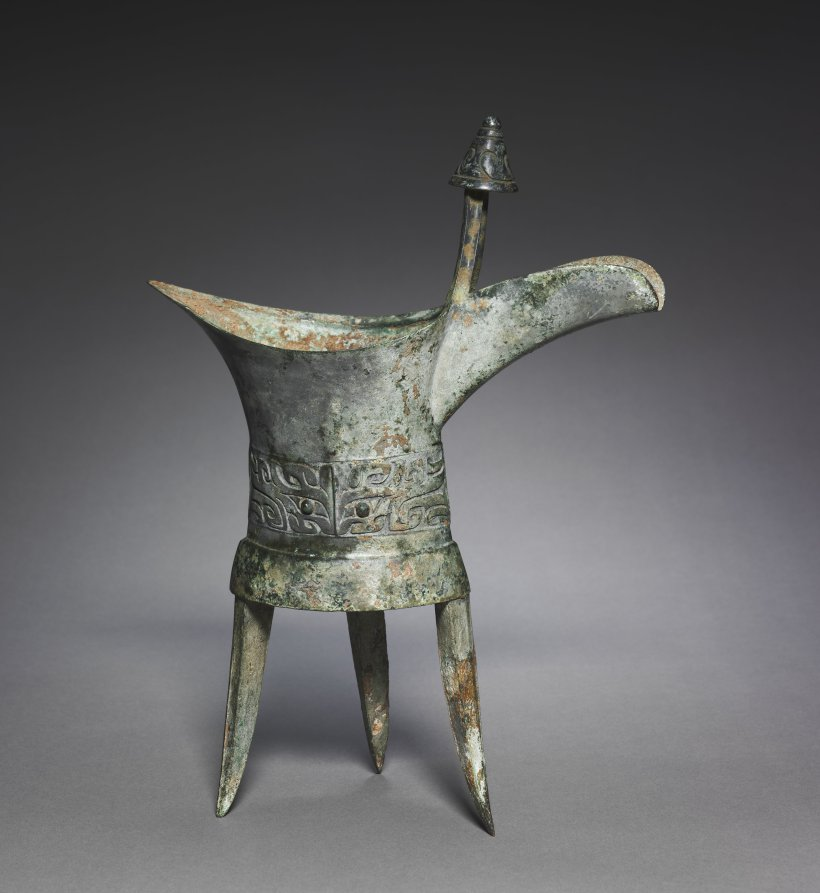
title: Wine Cup (Jue)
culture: China, Shang dynasty (c. 1600–c. 1046 BCE), Erligang phase (c. 1600–1400 BCE)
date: c. 1400 BCE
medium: bronze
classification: Metalwork